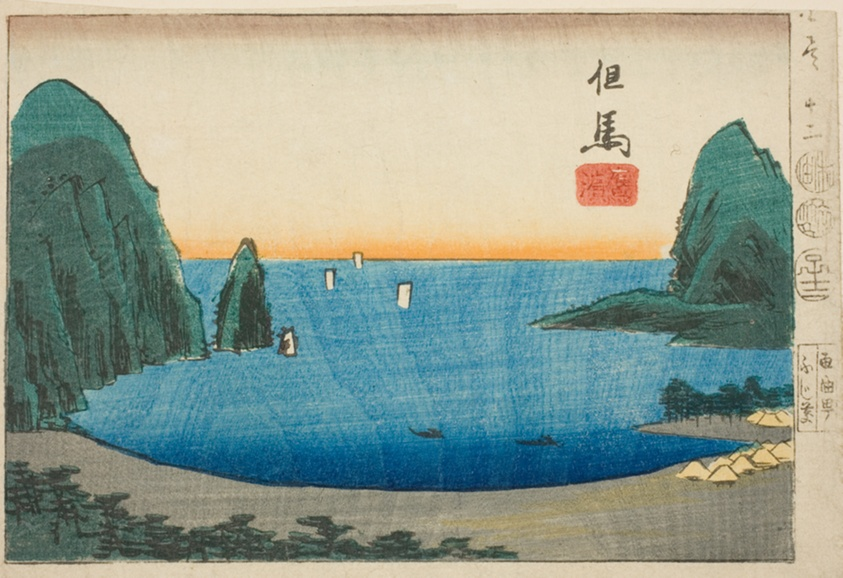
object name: Print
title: Takanohama in Tajima, section of sheet no. 12 from the series "Cutout Pictures of the Provinces (Kunizukushi harimaze zue)"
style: Japanese (culture or style)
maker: Utagawa Hiroshige 歌川 広重; Japanese, 1797-1858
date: 1852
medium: Color woodblock print; section of harimaze sheet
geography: Japan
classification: woodblock print; print; asian art